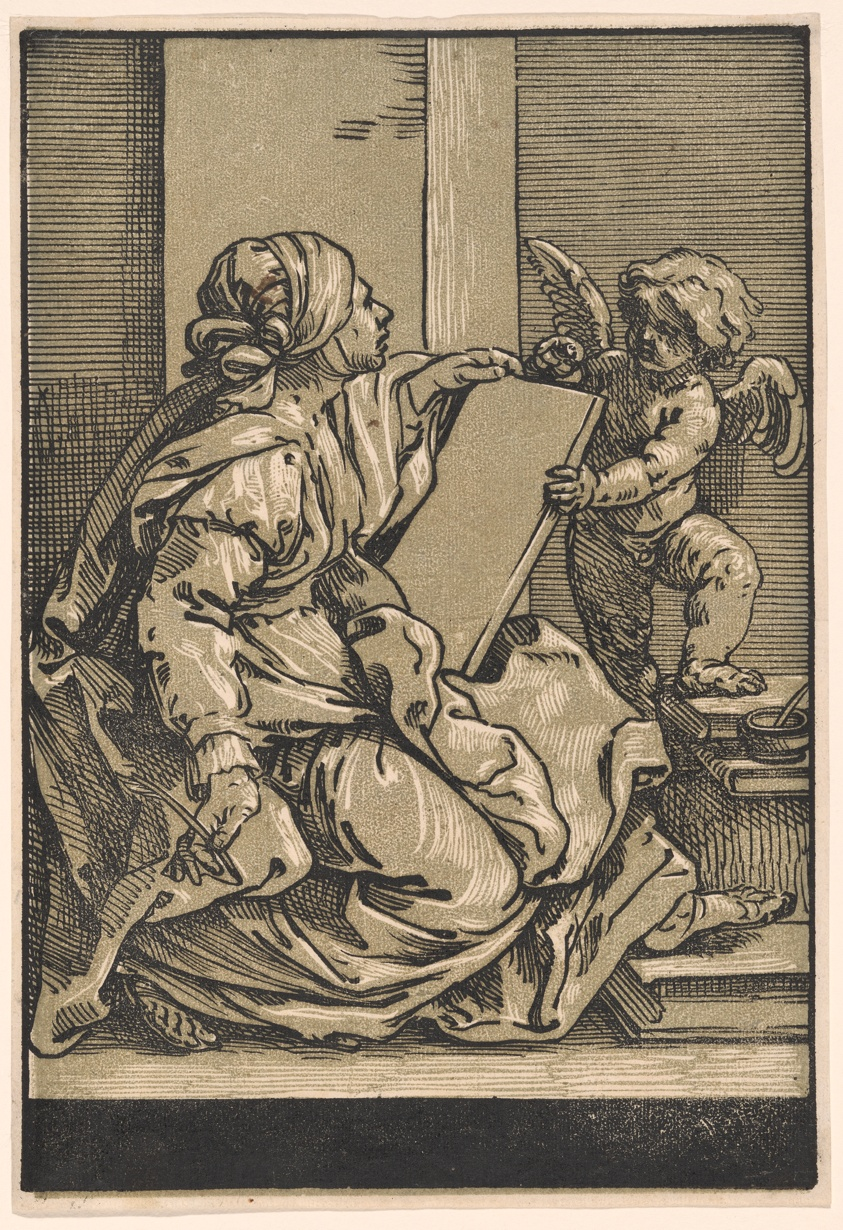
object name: Print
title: Sibyl Holding a Tablet with a Winged Putto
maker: Bartolomeo Coriolano (Italian, c. 1599–c.1676); after Guido Reni (Italian, 1575–1642)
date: c. 1640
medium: Chiaroscuro woodcut in green and black on cream laid paper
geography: Italy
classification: print; paper; prints and drawing; chiaroscuro woodcut